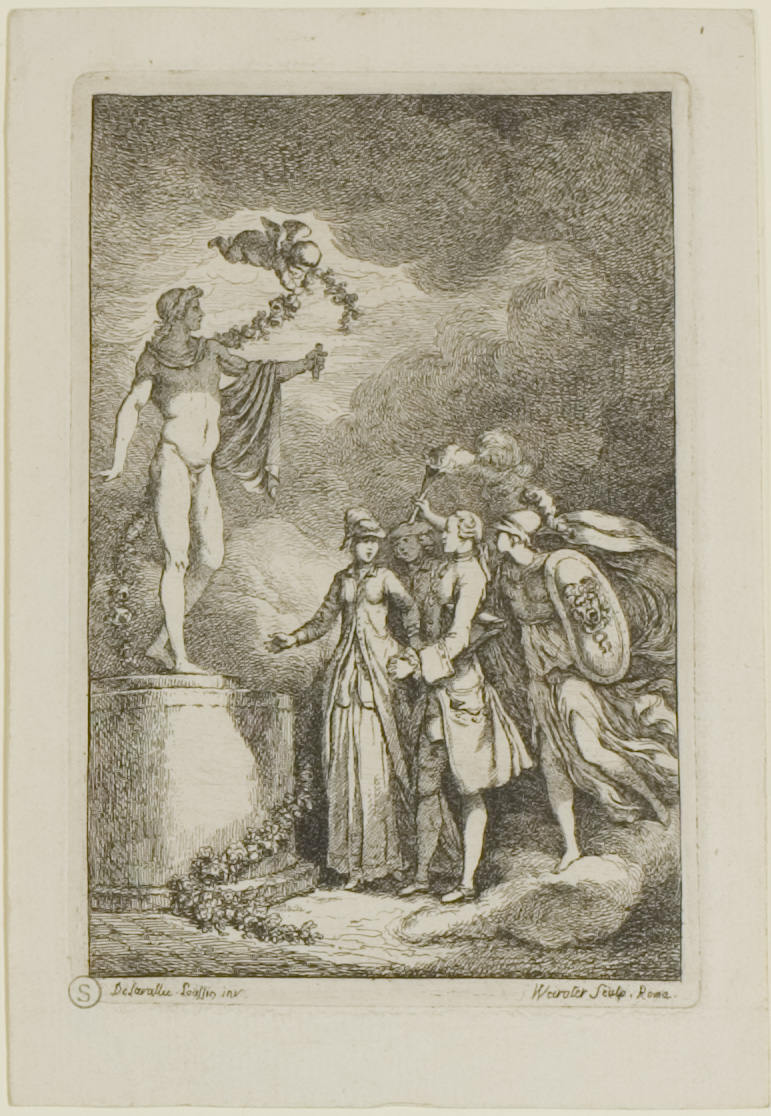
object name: Print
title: Plate from, Nella Venuta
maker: Franz Edmund Weirotter (Austrian, 1730–1771); after Etienne de Lavallée-Poussin (French, 1735–1802)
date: 1764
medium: Etching in black on ivory laid paper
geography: France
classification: etching; paper; print; prints and drawing